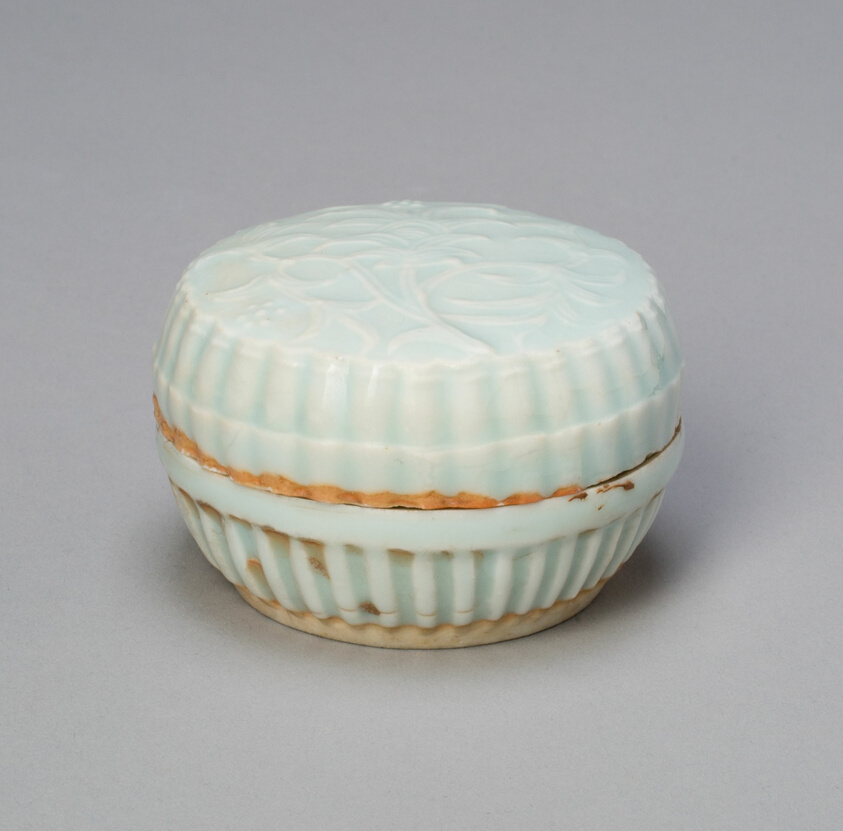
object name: Vessel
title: Lobed Cosmetic Box with Flowering Stems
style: Chinese (culture or style)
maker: China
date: Southern Song (1127–1279) or Yuan dynasty (1279–1368), 13th/14th century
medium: Qingbai ware; porcelain with underglaze molded decoration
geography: China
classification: vessel